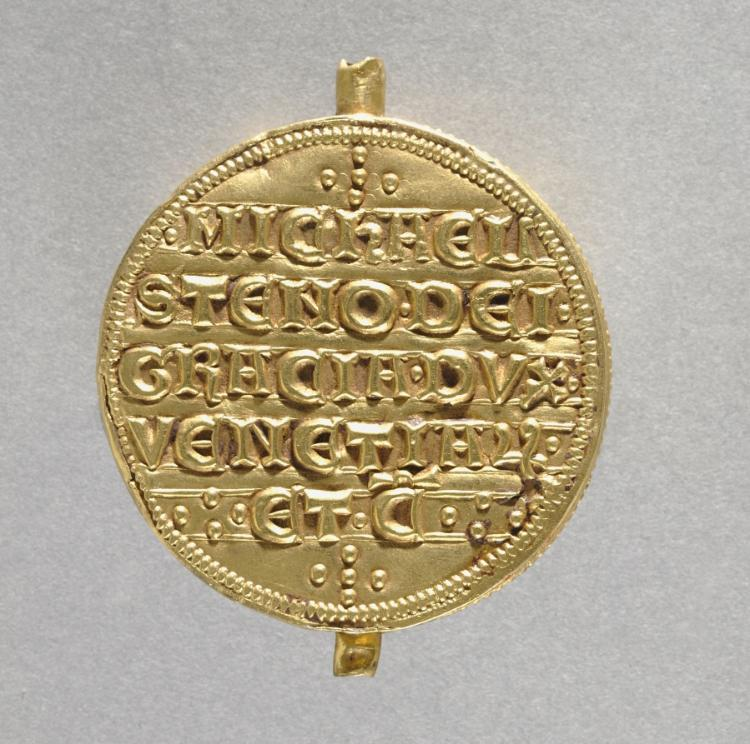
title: Seal of Doge Michele Steno (reverse)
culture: Italy, Venice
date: 1400–1409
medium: repoussé gold over a core of wax and resin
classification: Metalwork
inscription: MICHAELI STENO . DEI . GRACIA . DVX . VENETIAE . ET . C.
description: This opulent seal, an example of the splendor surrounding the ruler of Venice, was once attached to a charter issued in 1409. Seals were molded or embossed and attached to official documents as evidence of authenticity. This example is thought to be one of the finest Venetian seals to be preserved.